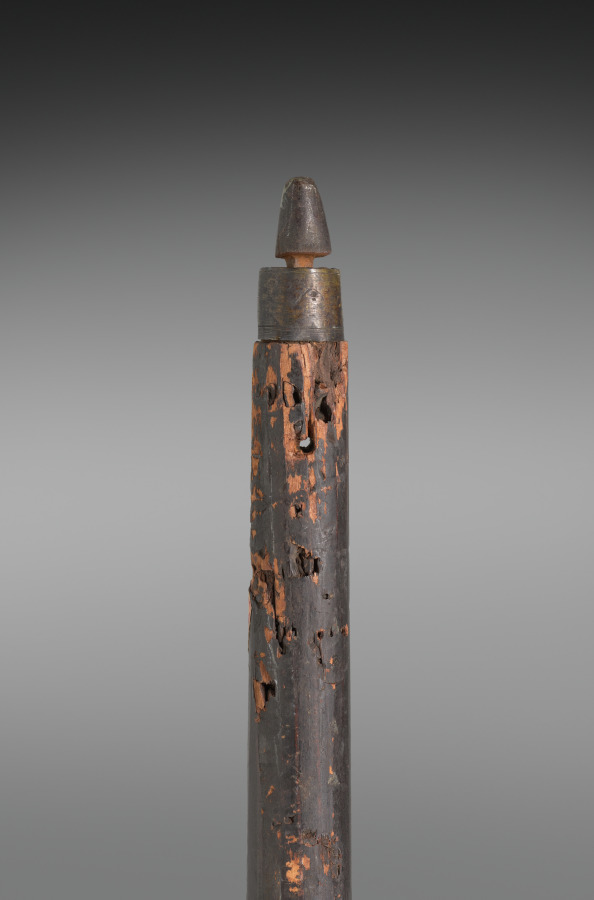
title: Banner with a Quartered Royal Arms of Spain and the Madonna and Child (pole)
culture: Spain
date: 1500s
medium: wood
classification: Arms and Armor